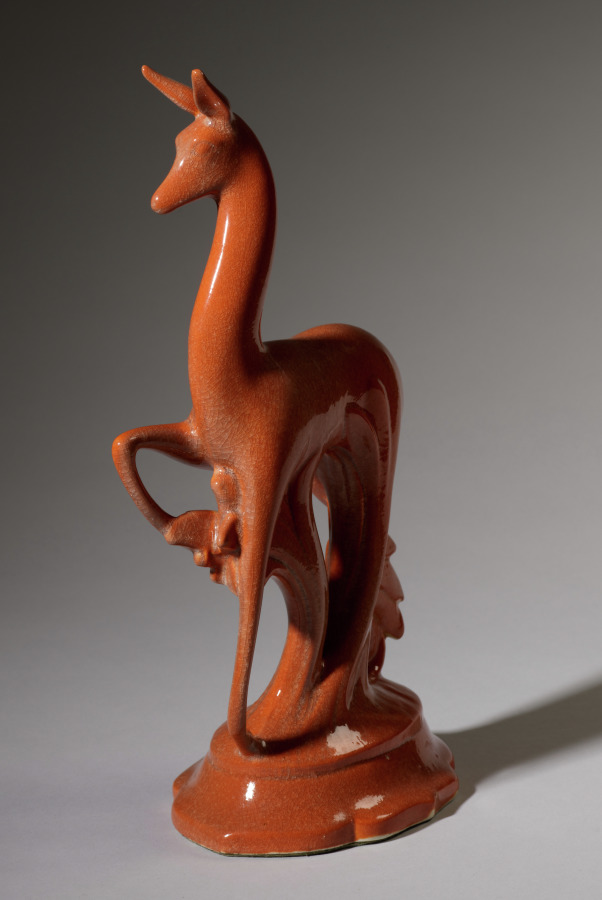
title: Fawn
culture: America, Ohio, Cleveland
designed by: Waylande Gregory (American, 1905–1971)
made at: Cowan Pottery Studio (America, Ohio, Rocky River, 1920–1931)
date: 1929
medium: earthenware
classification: Ceramic